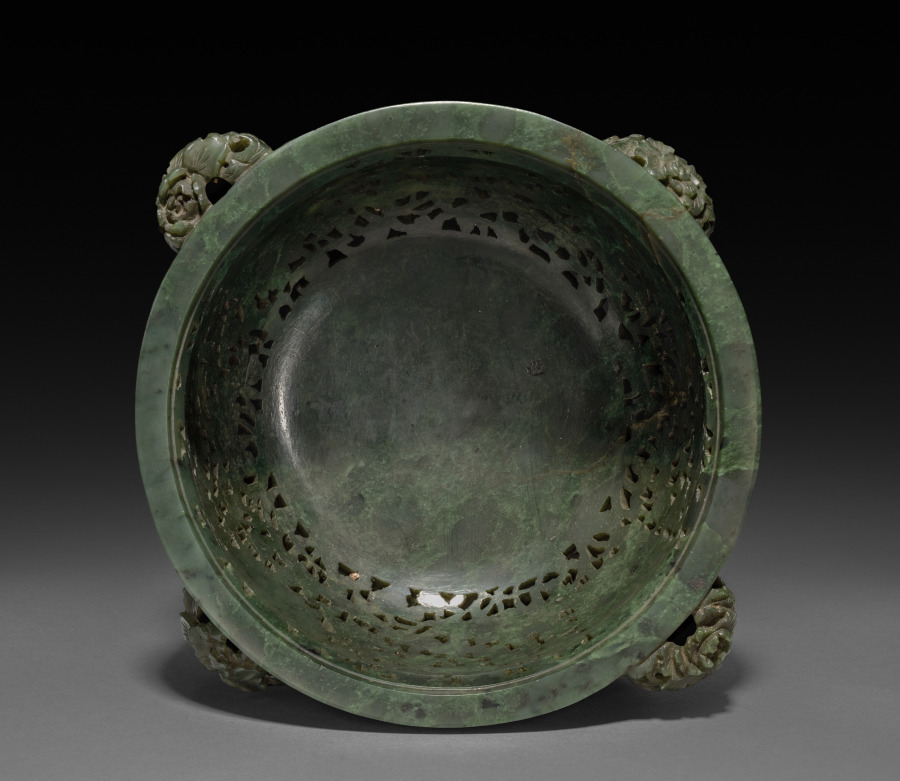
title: Fragrance Container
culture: China, Qing dynasty (1644–1911), Qianlong reign (1736–95)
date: 1736–95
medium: jade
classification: Jade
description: In the Qing (1644–1911) dynasty, luxury items became more affordable to larger parts of the society, including women, merchants, and literati in non-official positions. Imperial patronage and a growing urban population encouraged consumption of luxury goods and local craftmanship. This spinach-green jade incense burner has pierced floral designs and four pierced floral handles. It illustrates the superb carving skills and the creative mind of its accomplished creator, who sought clients on a competitive market